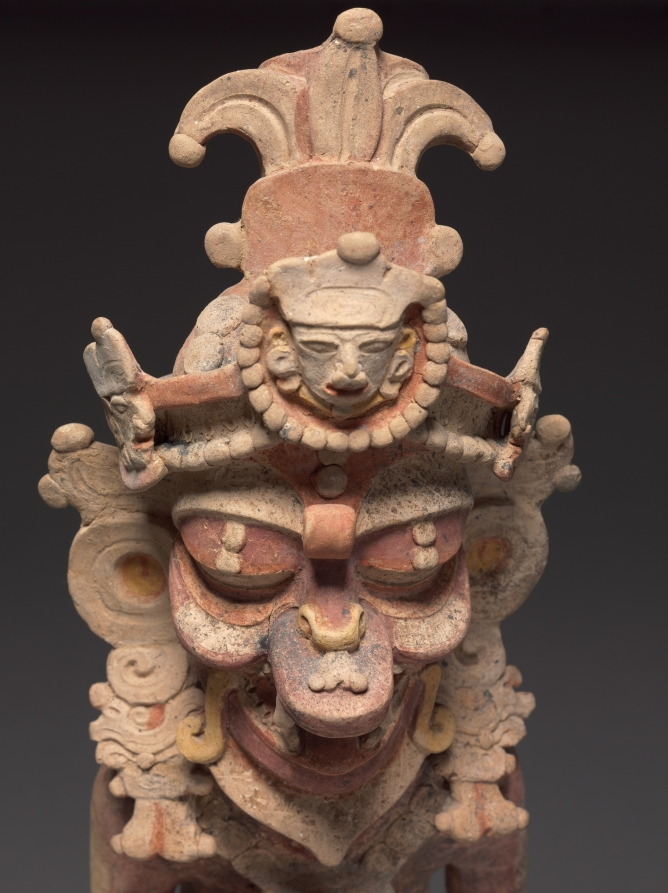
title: Artisan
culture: Guatemala, Petén region, Maya style (250-900), Maya style (250-900)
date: 250–600 CE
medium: earthenware with colored slips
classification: Sculpture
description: These figures represent the supernatural patrons of the visual arts and writing: the brothers Hun Batz and Hun Chuen ("One Monkey" and "One Artisan"). The two were refined artists but also bullies who tormented their younger brothers, who took revenge by transforming their elders into monkeys. Many Maya representations of the painter-scribes immortalize this fate by depicting the pair with both simian and human features, as here. The brothers are shown engaged in artistic or scribal pursuits. Sitting on high-domed bases that may have served as the lids of incense or offering bowls, each apparently once grasped a tool in his upper hand-for instance, a paint brush or a stylus for writing. In the lower hand, one cradles a small mask and the other, a piece of bark that likely refers to the beaten bark from which the Maya made books.